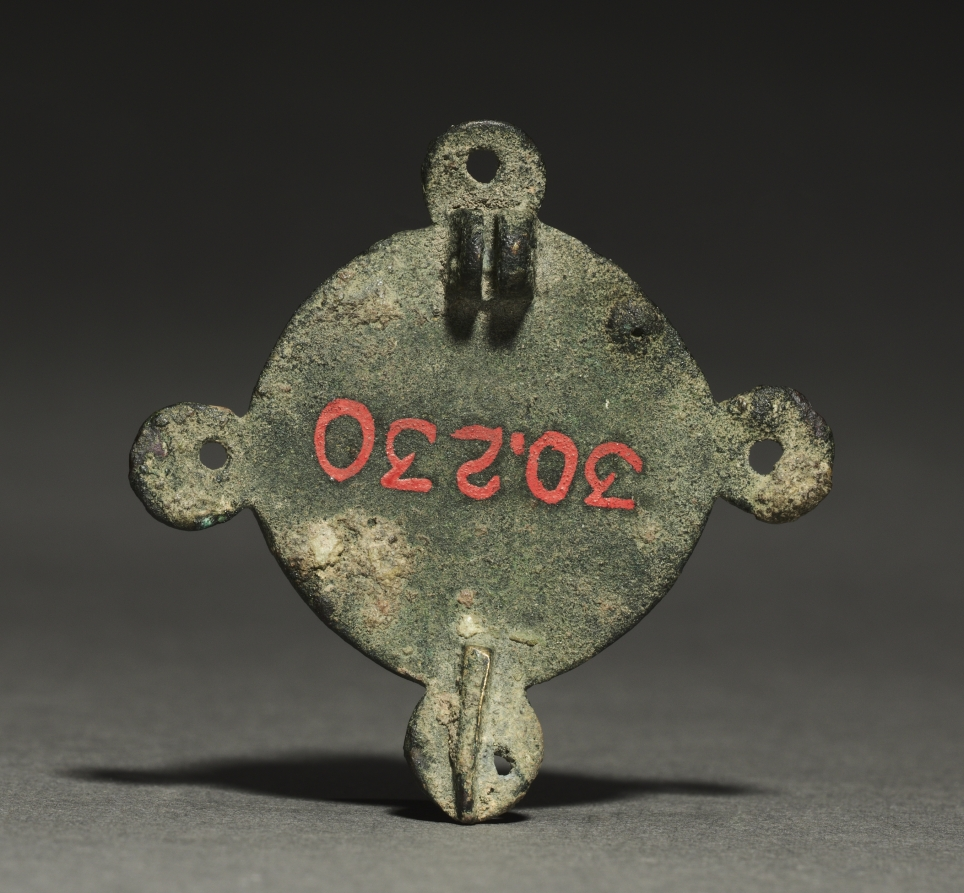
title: Ornamental Brooch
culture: Gallo-Roman or Romano-British, Migration period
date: c. 100–300 CE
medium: bronze and champlevé enamel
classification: Jewelry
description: These brooches functioned as garment clasps (much like the generally larger fibulae) and are distinctive for their decorative enamels. The art of enameling was highly popular among the conquered peoples who lived on the outskirts of the Roman empire, chiefly the Celts and the Gauls. Though the enameling technique was practiced by the Romans themselves on small objects, the brightly colored decoration readily appealed to "barbarian" taste. By the AD 200s, enameled brooches like these were being made in abundance by the native peoples of Britain and Gaul (modern France and Belgium).